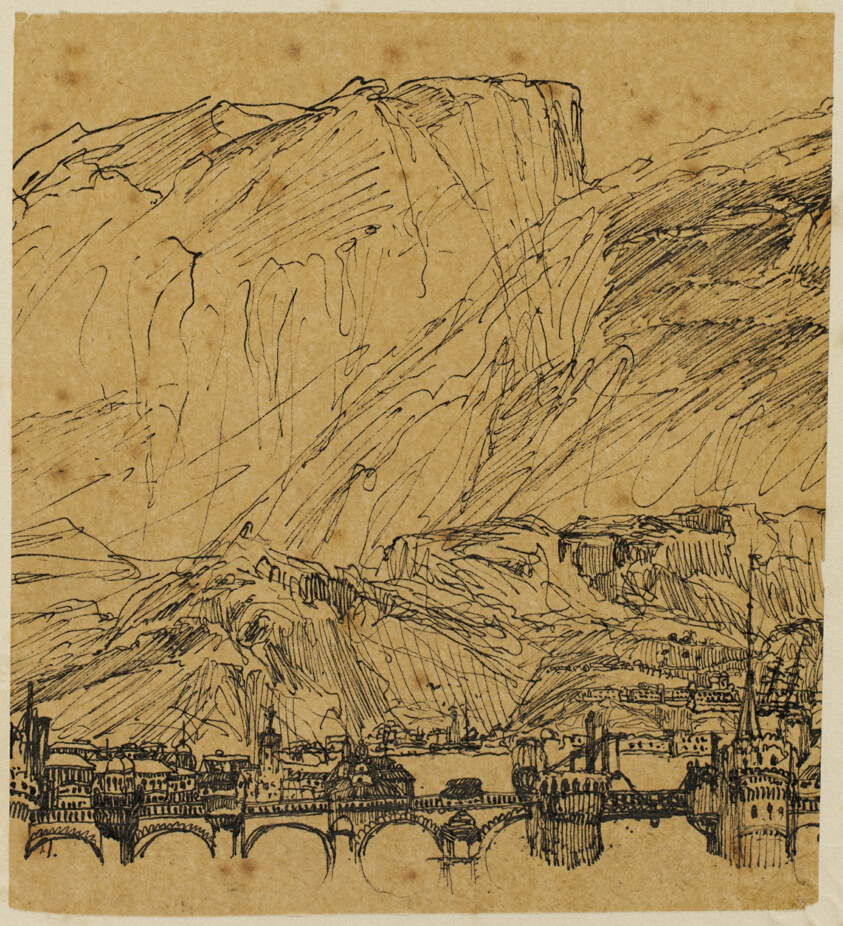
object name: Drawing and Watercolor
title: The Great Bridges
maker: Rodolphe Bresdin (French, 1825-1885)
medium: Pen and black ink, on tan tracing paper, laid down on buff wove paper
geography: France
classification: pen and ink drawings; drawings (visual works); prints and drawing